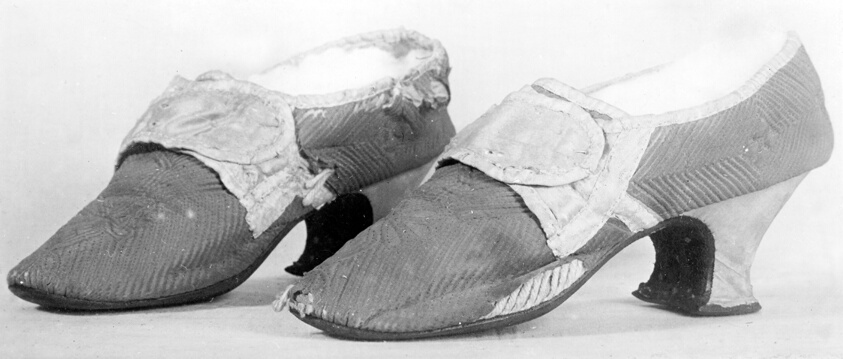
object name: Textile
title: Pair of Shoes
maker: England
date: c.1770s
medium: Leather, silk, plain weave; quilted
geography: England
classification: textile; costume accessory - shoe; shoes - misc; costume; dress (garment); clothing